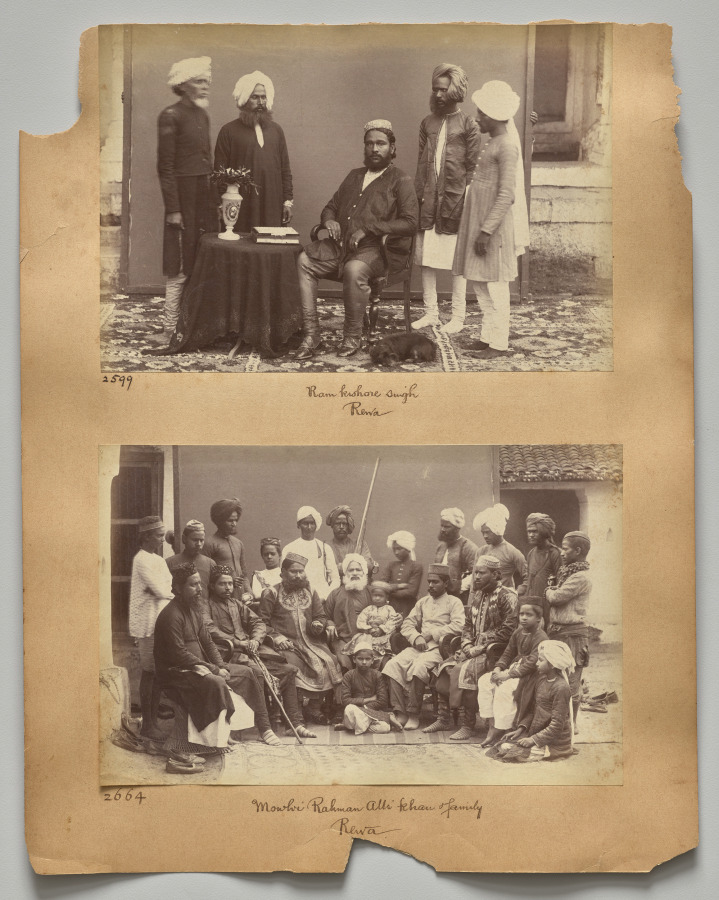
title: Mowhri Rahman Alli Khan family, Rewa (recto, bottom)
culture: India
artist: Raja Deen Dayal (Indian, 1844–1905)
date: c. 1882–87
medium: albumen print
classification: Photograph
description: These photographs are part of an album, now disassembled, of around 105 photographs taken in India between 1885 and summer 1887 that provide glimpses into the lives of the British colonial elite and royal and upper-class Indians. The museum holds another group of 37 pictures from this album (2016.266), which was probably commissioned by a British civil servant visiting or working in India around 1888 as a personal souvenir of his experiences there.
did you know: Raja Deen Dayal is regarded now, and was considered during his lifetime, to be India’s most important 19th-century photographer.